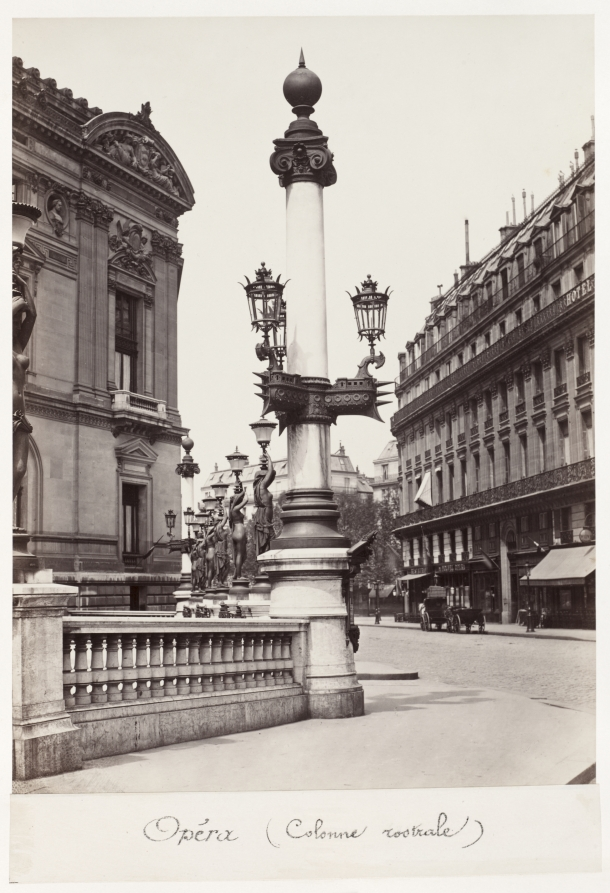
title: Opéra (Rostral Column)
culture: France, 19th century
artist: Charles Marville (French, 1813–1879)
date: c. 1875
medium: albumen print from wet collodion negative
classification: Photograph